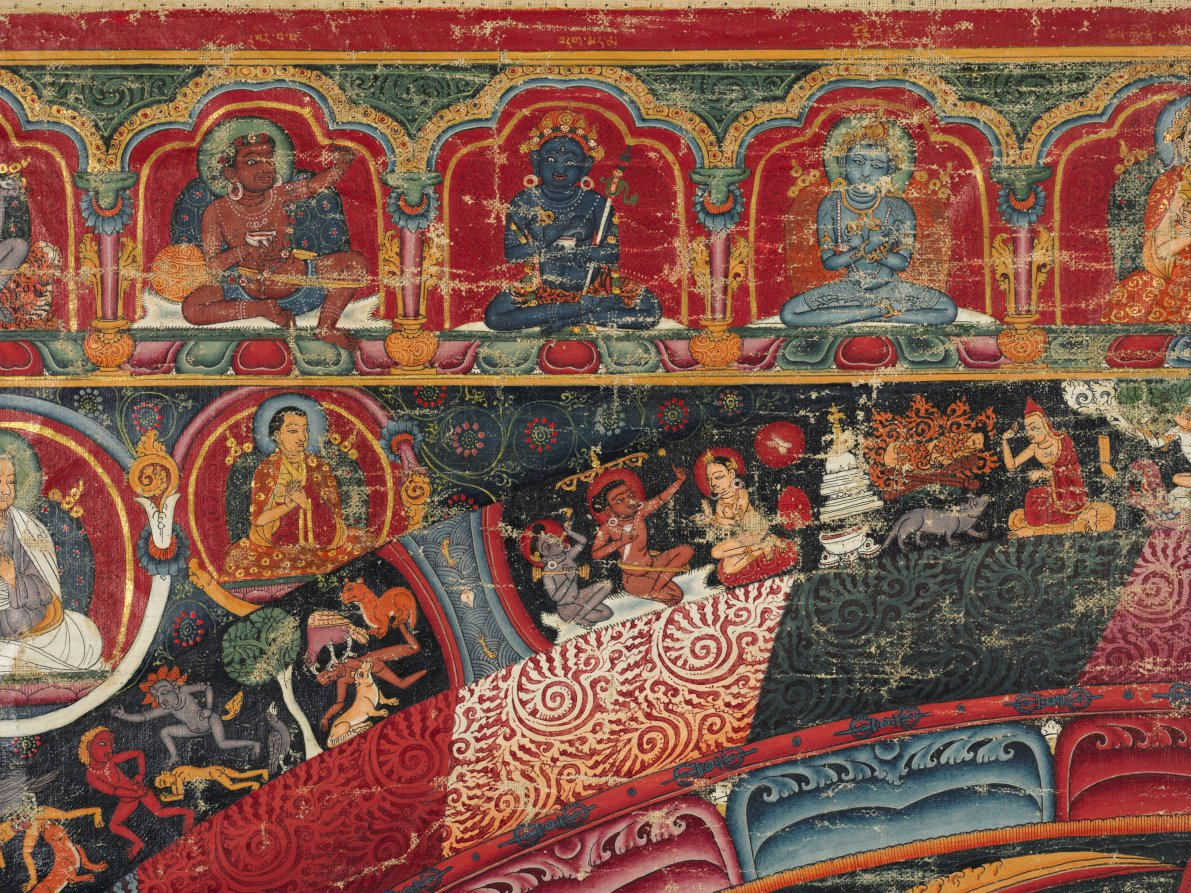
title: Twenty-three Deity Nairatma Mandala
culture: Central Tibet, Sakya-affiliated monastery, 14th century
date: c. 1375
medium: Gum tempera, ink, and gold on cloth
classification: Painting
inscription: The inscription along the bottom says: Twenty-three deity Nairatma Mandala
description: One of the main types of imagery in tantric Buddhist art is the mandala, a two-dimensional diagram of the realm of an enlightened being. This mandala depicts the palace of Nairatma, who dances in the center surrounded by her entourage. Using the painting as a guide, the tantric practitioner in meditation mentally projects the two-dimensional plan into three-dimensional space and enters into it. The outermost ring contains depictions of the cremation grounds, where corpses are being burned and consumed, as well as tantric yogis and masters who work there in order to understand the impermanence of the body, defeat their fear of death, and overcome irrational aversions to impure aspects of life. Virupa is depicted twice, always pointing to arrest the sun with his raised left hand. He sits among the row of lineage masters along the top edge, and is also depicted in the topmost segment of the ring of cremation grounds, being served a cup of liquor. Along with lineage masters at the top of this impressive painting, bodhisattvas and important masters are depicted in the spandrels, each identified by an inscription.